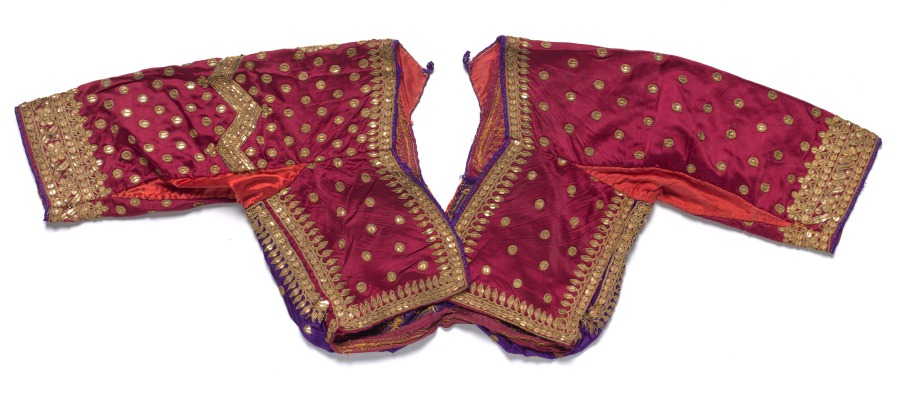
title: Bodice or Coli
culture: India, late 19th century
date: late 1800s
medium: embroidered satin with gold thread and sequins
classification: Garment